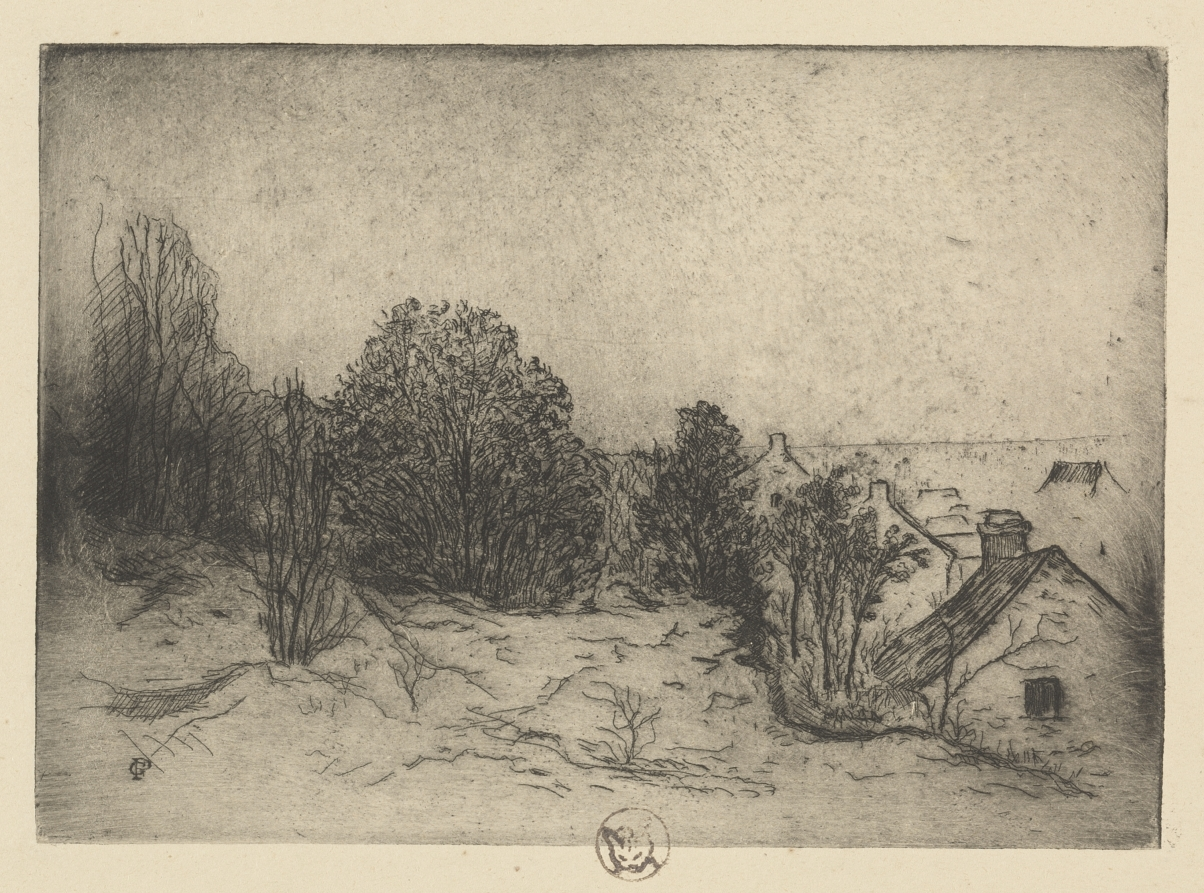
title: Six Etchings: Vesnots, Auvers on the Oise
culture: France, 19th century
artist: Paul Gachet (French, 1828–1909)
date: 1895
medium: etching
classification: Print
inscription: verso, in brown ink: Les Vesnots. Auvers/oise (S et O) [Seine and Oise Rivers]